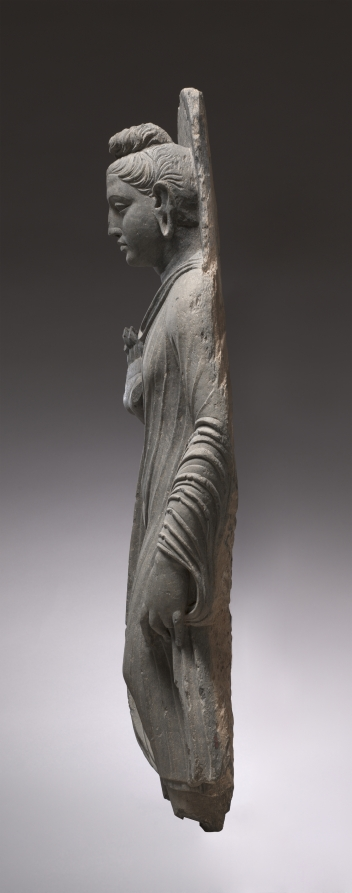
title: Standing Buddha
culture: Pakistan, Gandhara, Kushan period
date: 150–200 CE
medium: schist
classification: Sculpture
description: Combining elements from both the Mediterranean and South Asian worlds, the artists of Gandhara created a new vision of the Buddha during the period of high contact between the two regions from the 100s to 200s AD. They were among the first to show the Buddha with a placid expression, thick wavy hair, and clothed in a heavy, toga-like monk’s robe.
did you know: The cavity at the top of the head may have once held a portion of the Buddha's relics.